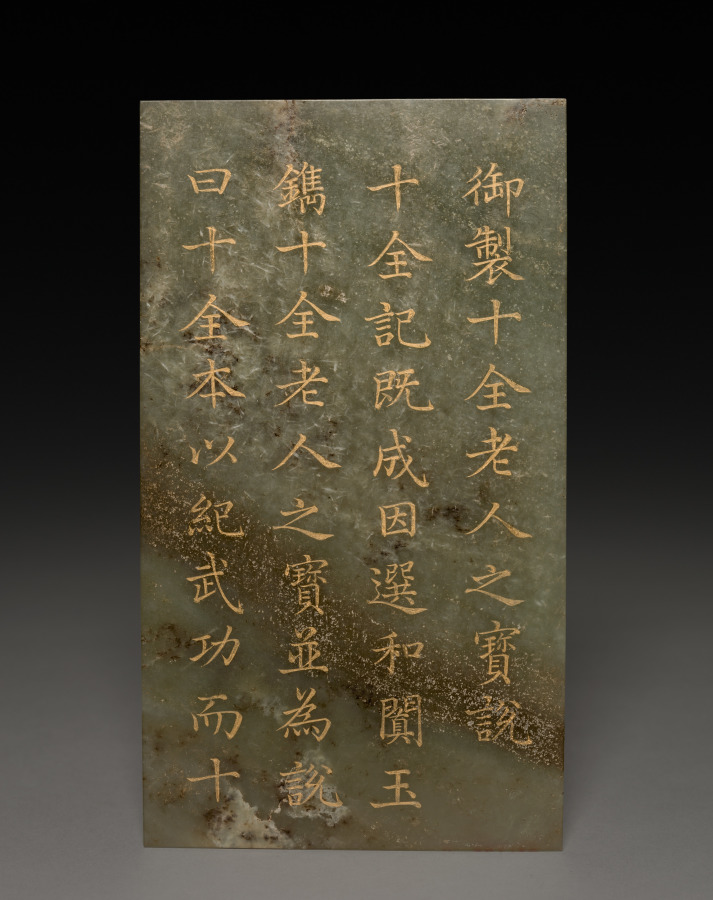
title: Tablet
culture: China, Qing dynasty (1644–1911), Qianlong reign (1736–95)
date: 1778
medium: jade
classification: Jade